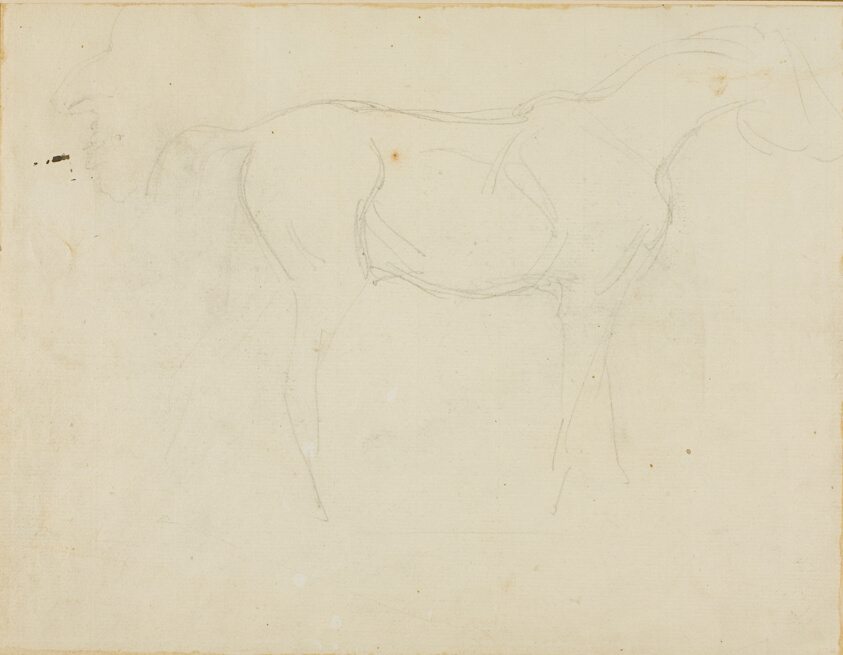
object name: Drawing and Watercolor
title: Sketch of a Horse Facing Right and a Caricature in Profile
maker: Jean Louis André Théodore Géricault (French, 1791-1824)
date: 1818/19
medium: Graphite, on cream laid paper, perimeter mounted on cream wove paper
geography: France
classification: graphite; drawings (visual works); prints and drawing